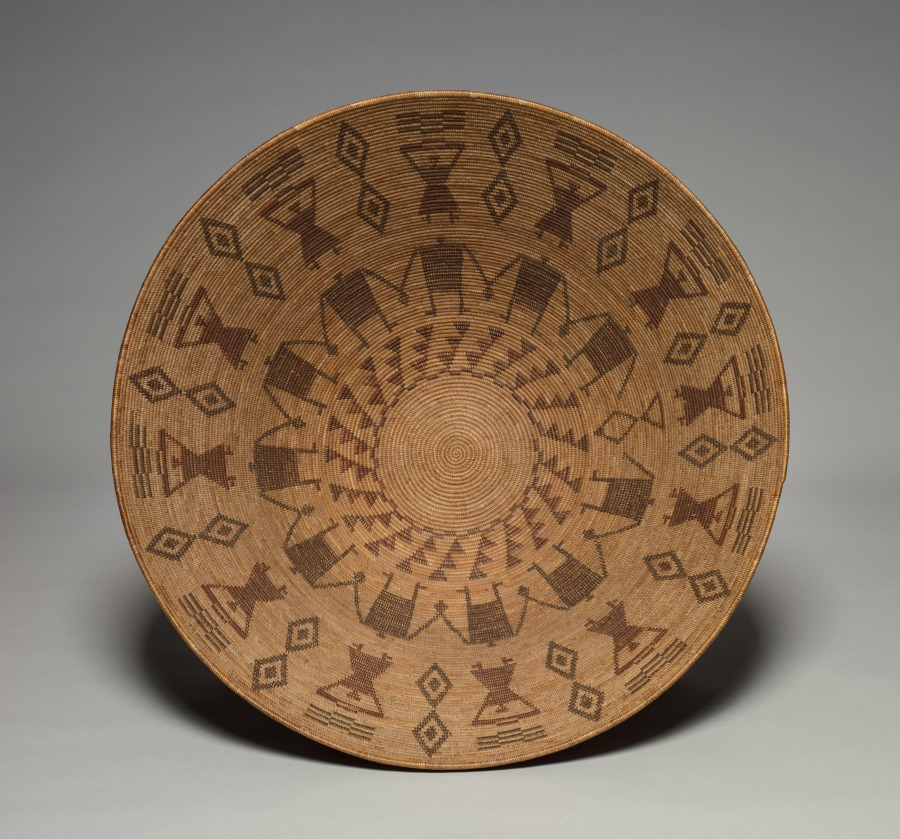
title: Presentation Bowl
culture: Native North America, California, Yokuts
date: 1900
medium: redbud, bracken fern; coiled, grass foundation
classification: Basketry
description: This fine bowl was created by a weaver of the Yokuts, who lived in California’s San Joaquin Valley to the west of Koso (Panamint) Shoshone territory. Shared design motifs indicate contact between the two areas. For instance, the humans who appear to be holding hands in one register on this basket also occur on a small Koso (Panamint) Shosone basket in the collection.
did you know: This fine bowl was created by a weaver of the Yokuts, who lived in California’s San Joaquin Valley.